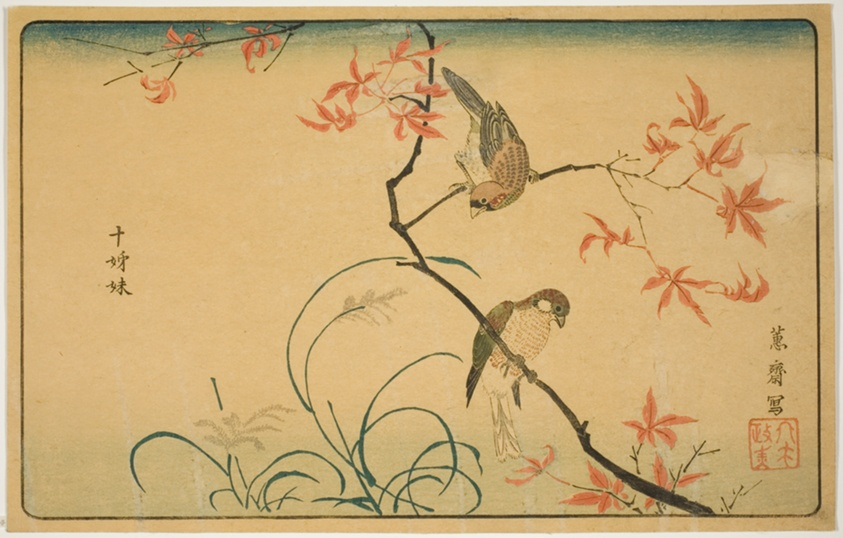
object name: Print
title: Society Finches (Jushimatsu)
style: Japanese (culture or style)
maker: Kitao Masayoshi (Kuwagata Keisai) (Japanese, 1764–1824)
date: 1790s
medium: Color woodblock print; oban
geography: Japan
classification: print; asian art